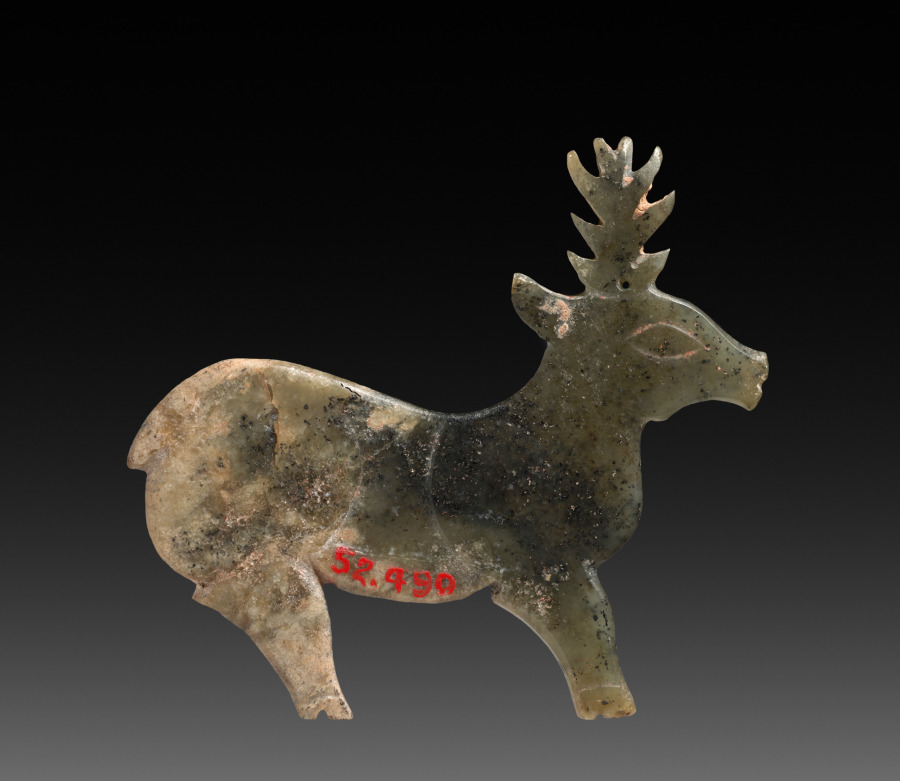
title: Stag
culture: China, Western Zhou dynasty (c. 1046–771 BCE)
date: 1100–900 BCE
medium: jade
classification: Jade